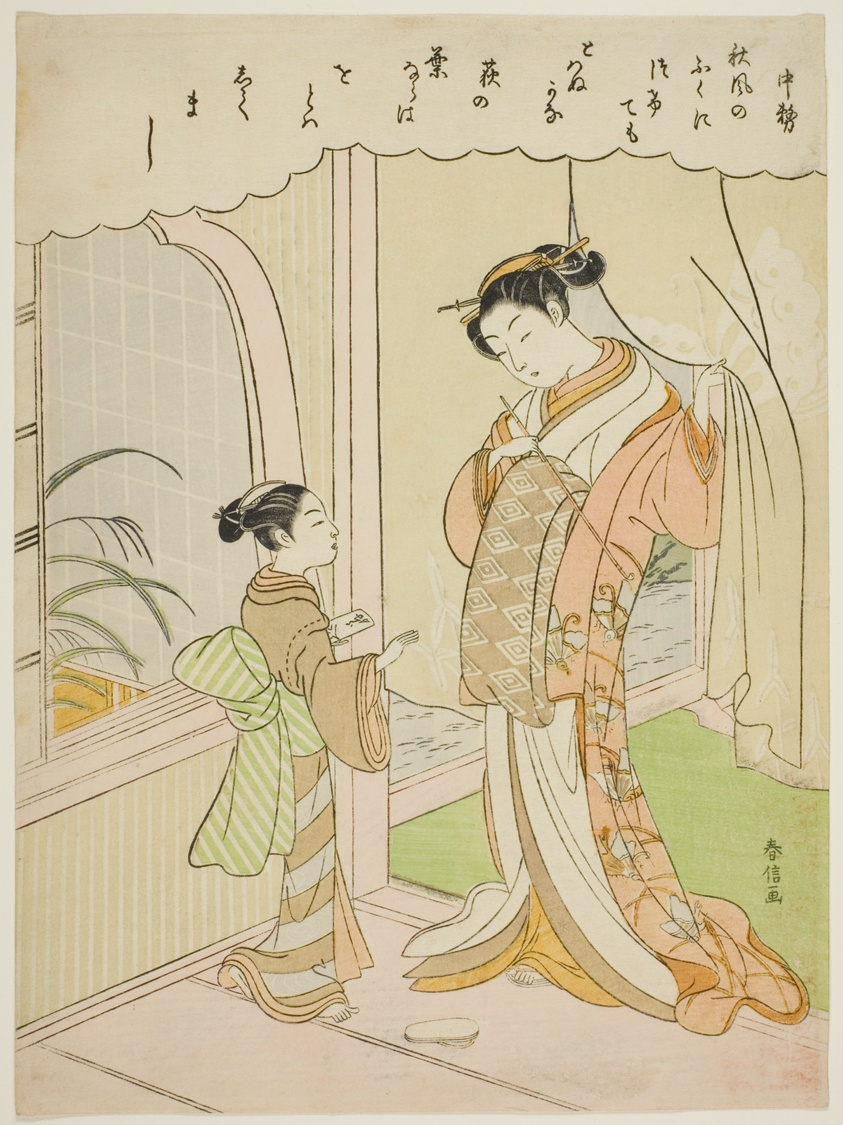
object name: Print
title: Poem by Nakatsukasa, from an untitled series of Thirty-Six Immortal Poets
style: Japanese (culture or style)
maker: Suzuki Harunobu 鈴木 春信; Japanese, 1725 (?)-1770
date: c. 1767/68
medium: Color woodblock print; chuban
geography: Japan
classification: woodblock print; print; asian art